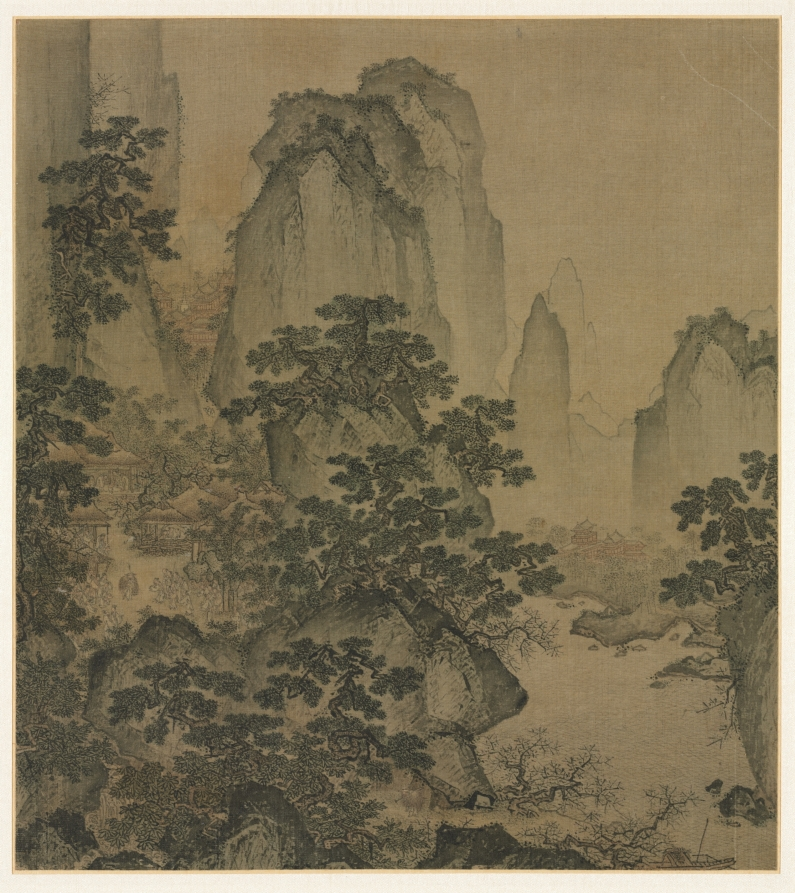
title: The Haven of the Peach-Blossom Spring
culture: China, Ming dynasty (1368–1644)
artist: attributed to Shi Rui (Chinese, c. 1400-c. 1470)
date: mid-1400s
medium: Album leaf; ink and slight color on silk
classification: Painting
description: A miniature inspired by the “Peach Blossom Spring,” this painting illustrates the well-known tale written by the poet-recluse Tao Yuanming (365–427 CE), in which a fisherman accidentally discovers a hidden utopian village where residents live in harmony, untouched by the outside world's troubles. While the painting lacks a signature, scholars concur on its attribution to Shi Rui, evident from the dynamic landscape and the effortlessly rendered figures that showcase the artist's skill.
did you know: Some fifty inhabitants of the Peach Blossom Spring gather in a small clearing surrounded by thatched huts and cottages.